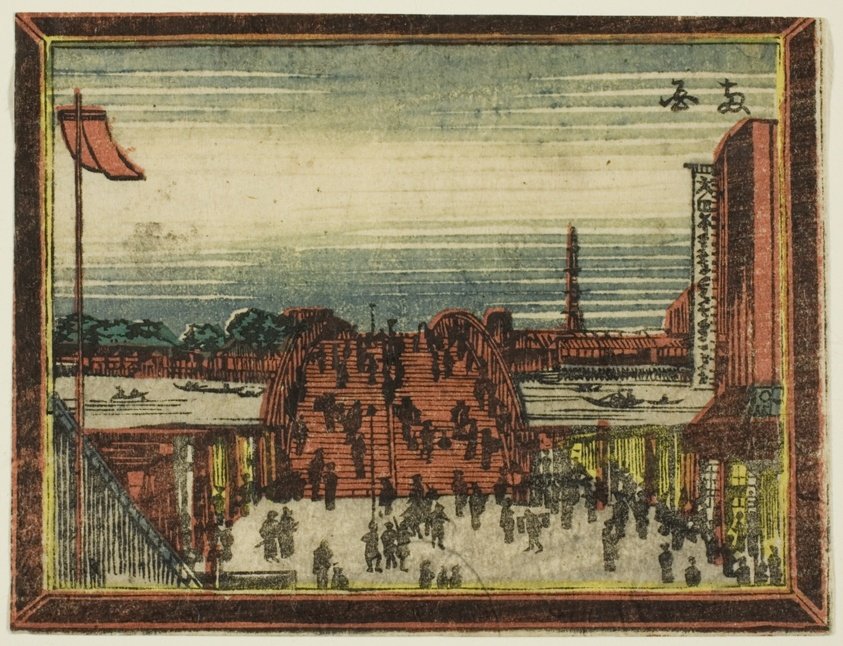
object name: Print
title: Ryogoku Bridge, from the series Dutch-style Pictures: Eight Views of Edo (Oranda gakyo Edo hakkei)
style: Japanese (culture or style), edo (japanese period), Japanism, East Asian, asian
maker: Katsushika Hokusai 葛飾 北斎; Japanese, 1760-1849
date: 1804/16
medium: Color woodblock prints; horizontal koban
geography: Japan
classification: woodblock print; print; asian art